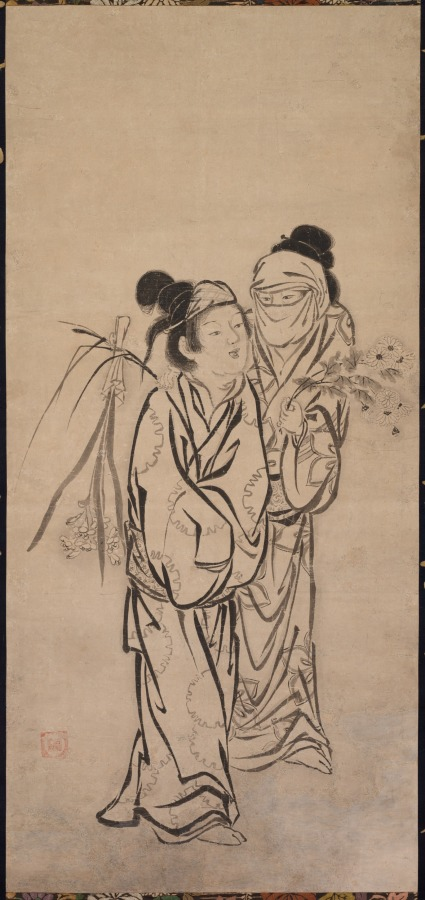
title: A Couple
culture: Japan, Momoyama period (1573–1615)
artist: Hasegawa Sōen (Japanese)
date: late 1500s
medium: hanging scroll; ink on paper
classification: Painting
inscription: Artist's seal at lower left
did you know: The person on the right holds a spray of chrysanthemums, while the other has daffodils suspended upside down from a stalk held over their shoulder.